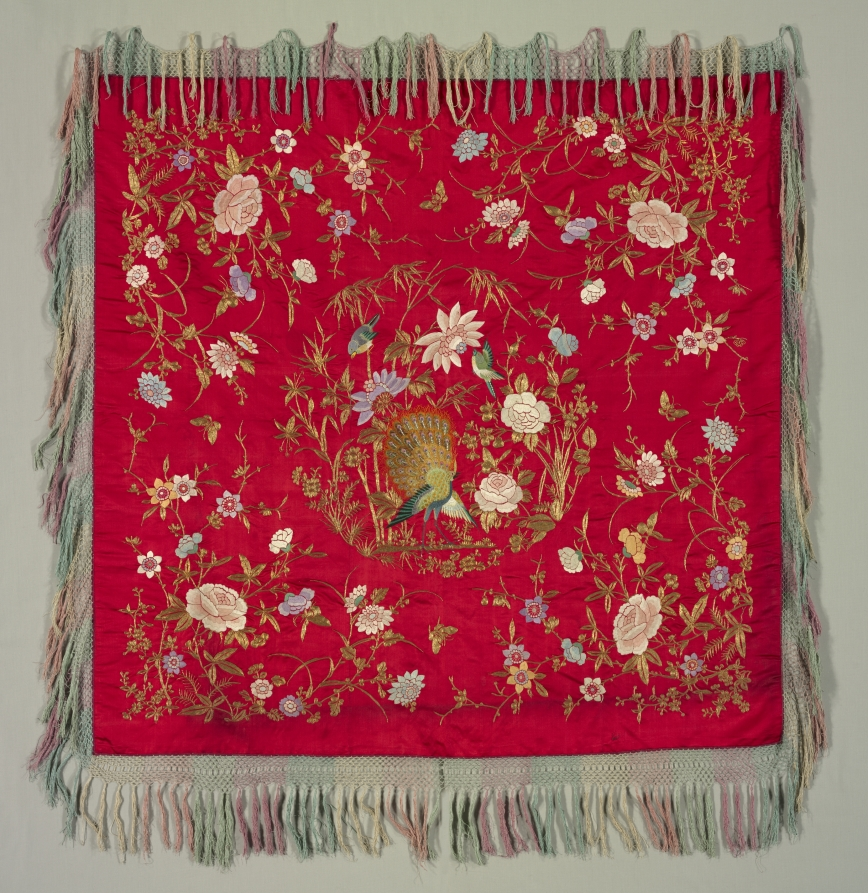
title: Tablecloth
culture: China, early 20th century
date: c. 1900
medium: silk satin weave ground with silk and metallic thread embroidery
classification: Embroidery